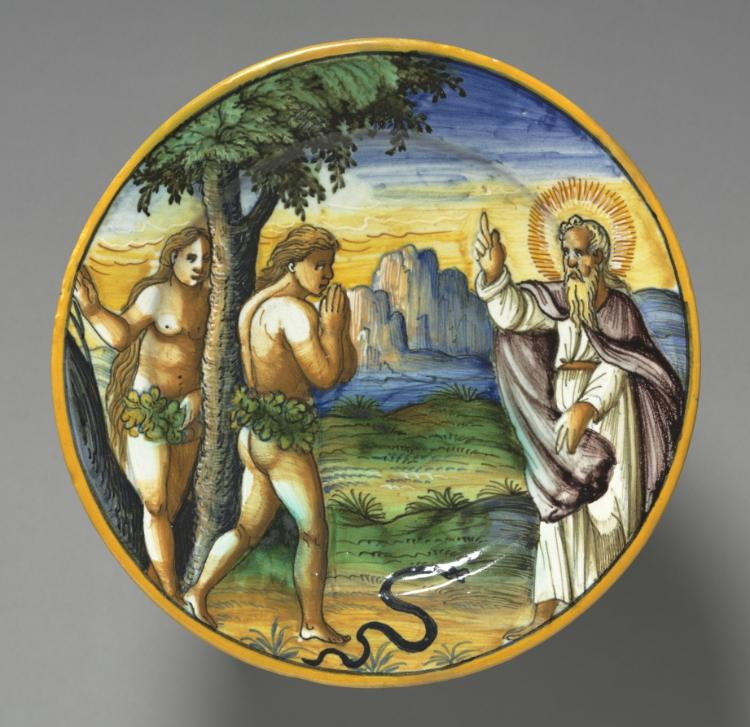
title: Dish Depicting the Expulsion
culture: France, Lyon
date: late 1500s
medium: tin-glazed earthenware (maiolica)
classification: Ceramic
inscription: inscribed on reverse: "guardo dio chiamo adam dopo il pechato."